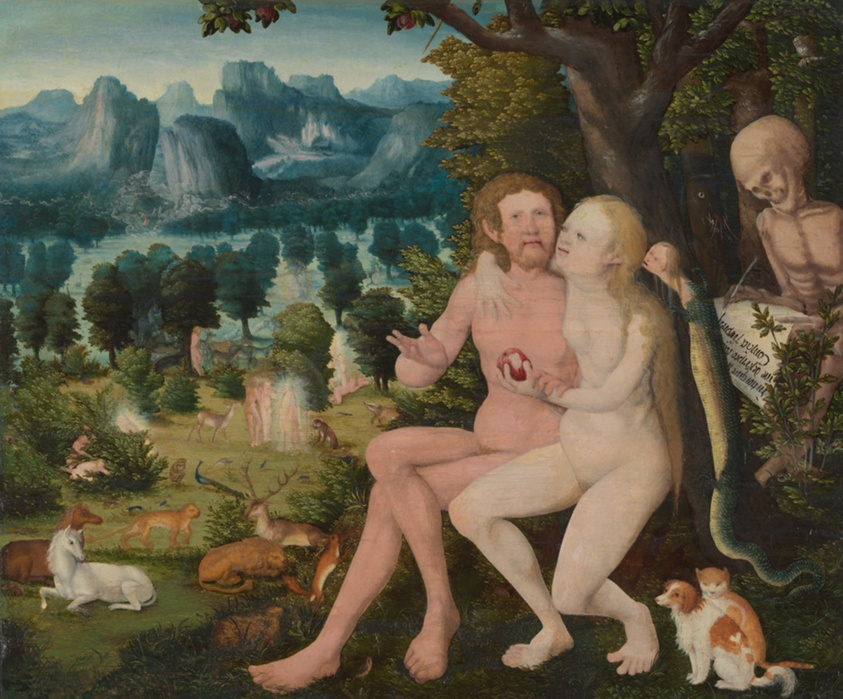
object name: Painting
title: The Fall of Man with Scenes of the Creation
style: 16th Century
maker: Attributed to Augustus Cordus (German, active 1544–1553)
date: 1544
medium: Oil on panel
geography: Germany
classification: oil on panel; german; oil paintings (visual works); paint; painting; european painting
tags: biblical, Adam (Biblical), animals, cats, Christian subjects, Christianity, crèation, death, deer, elephants, Eve (Biblical), figures, horses, landscape, lions, man, mountains, religion, religious, snake, trees, water, woman